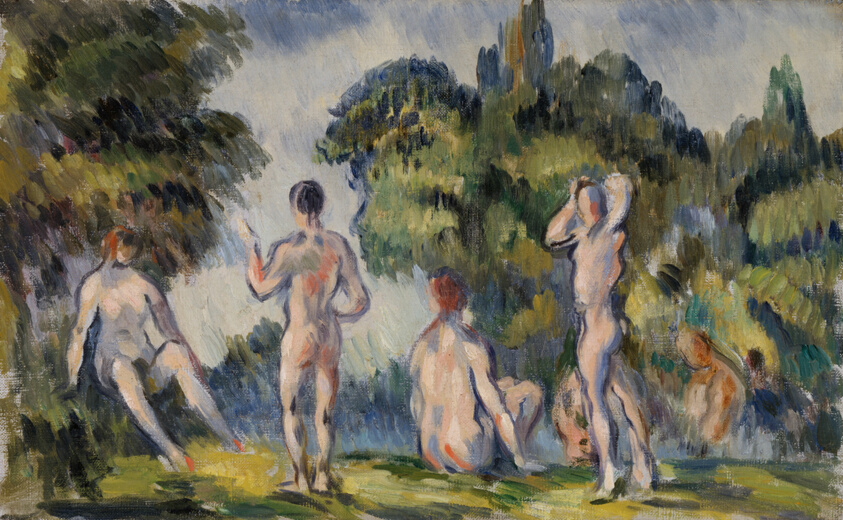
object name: Painting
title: Bathers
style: Post-Impressionism, 19th century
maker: Paul Cezanne (French, 1839–1906)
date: 1890–94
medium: Oil on canvas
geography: France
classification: oil on canvas; french; oil paintings (visual works); paint; painting; european painting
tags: bathers, bathing, nudes, trees, weather/seasons, women, landscapes, leisure